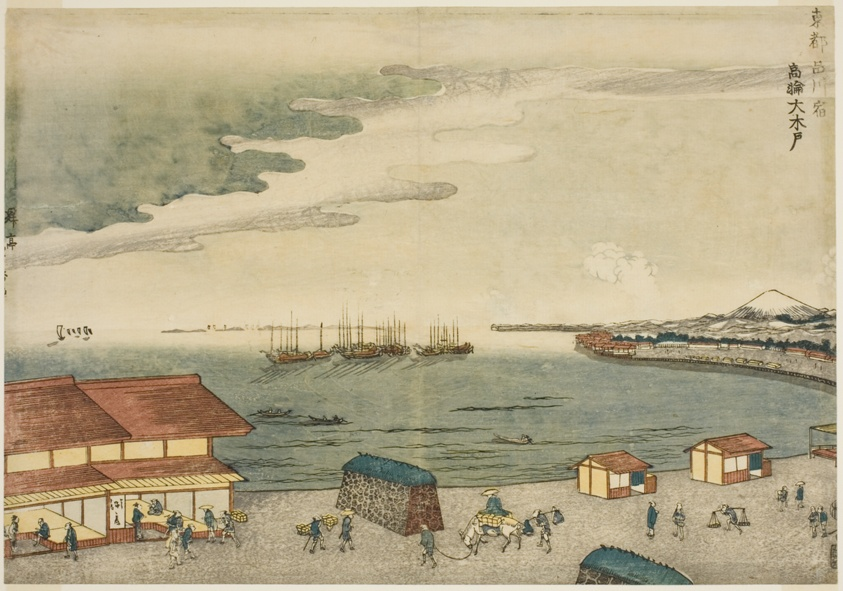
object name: Print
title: Takanawa Okido at the Shinagawa Station (Shinagawa-juku Takanawa Okido), from the series "Eastern Capital (Toto)"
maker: Shotei Hokuju (Japanese, active c. 1789-1818)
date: c. 1789/1818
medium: Color woodblock print; oban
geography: Japan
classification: woodblock print; print; asian art